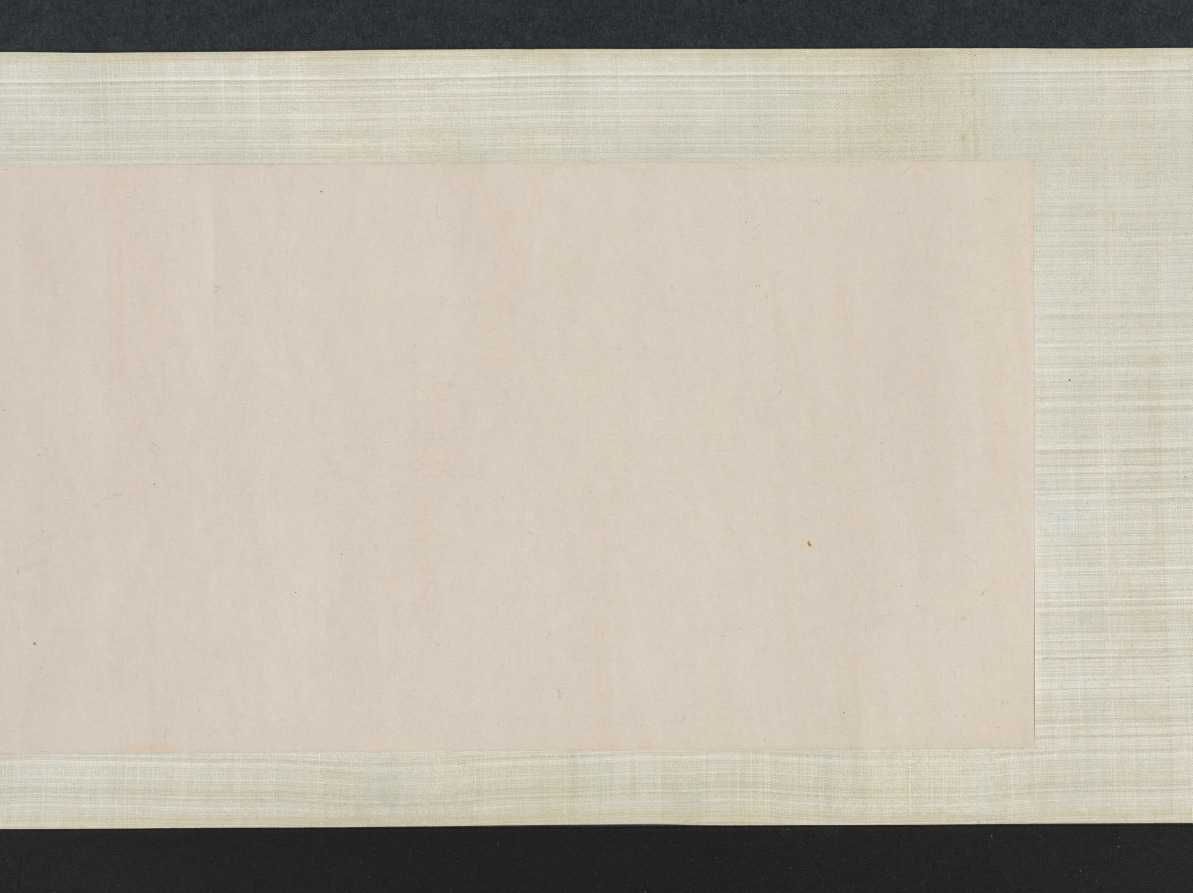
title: Saying Farewell at Xunyang (Song of the Pipa)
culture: China, Ming dynasty (1368–1644)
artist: Wen Boren (Chinese, 1502–1575)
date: 1500s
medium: handscroll, ink and color on paper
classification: Painting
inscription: "潯陽送客圖" 五峰山人文伯仁寫于停雲館中 [印] 文伯仁; 五峰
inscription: 2 colophons and 9 additional seals: 1 transcription of "Pipa xing 琵琶行” (Song of Pipa) and 3 seals of Zhu Yizun 朱彜尊 (1629-1709); 2 seals of Wu Rongguang 吳榮光 (1773-1843); 1 colophon, dated 1826, and 3 seals of Wu Xijia 吳錫嘉 (mid-1700s)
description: This handscroll depicts The Song of the Pipa, a poem by Bai Juyi 白居易 (772–846) written after the poet’s encounter with a pipa player on the Yangzi River. Expelled from her home city when her beauty and fame had faded, she played for the poet at night. Her musical performance and tragic life story resonated with Bai Juyi, who had just been demoted and exiled from life at court himself. The hazy, vast view and pale color tonalities of this painting illustrate these feelings of endless sadness, having lost one’s sense of purpose in life.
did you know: Wen Boren depicted the chilly autumn water with a fishnet pattern.